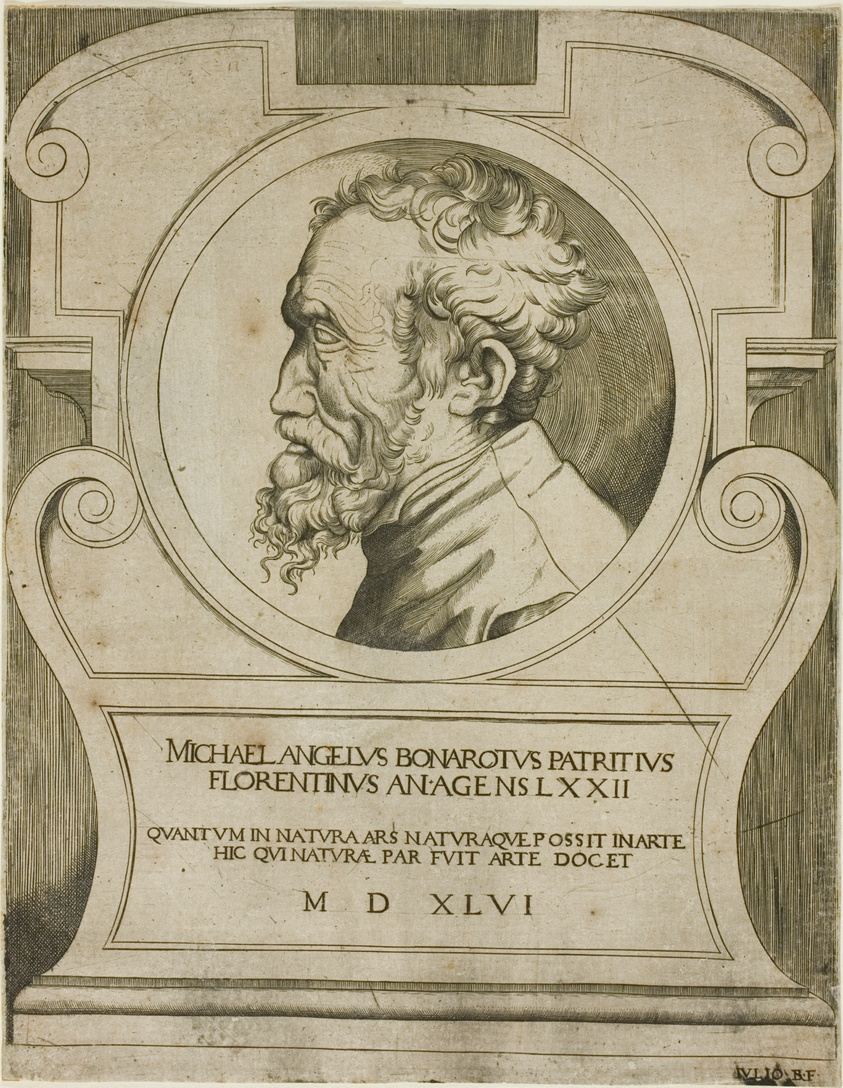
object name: Print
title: Michelangelo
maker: Giulio Bonasone (Italian, c. 1510–after 1576)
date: 1546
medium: Engraving on paper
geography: Italy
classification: print; prints and drawing